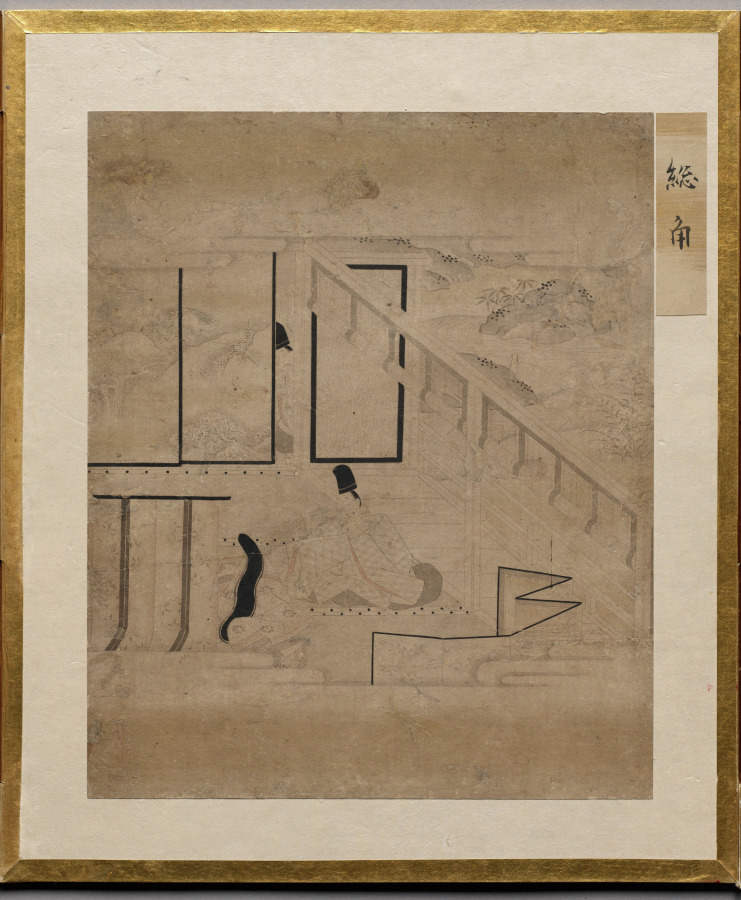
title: Trefoil Knots from Album of Illustrations for the Tale of Genji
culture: Japan, Edo period (1615–1868)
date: 1600s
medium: painting in an accordion-style album; ink, light color, and gold on paper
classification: Bound Volume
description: This album contains illustrations for the classic literary work the Tale of Genji, authored in the 1000s by Murasaki Shikibu, an aristocrat of the Heian period (794–1185) court. The scenes are painted in the “white drawing” (hakubyō) mode, in which a fine ink line is used to depict figures and spaces with great subtlety, punctuated only occasionally by traces of red pigment for a character’s lips, a detail of a garment, or a decorative element. These two scenes illustrate episodes from the chapters “Thin Veil of Cloud” (Usugumo) and “Barrier Gate” (Sekiya).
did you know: The illustrations are identified by chapter title in cartouches to the upper right of the paintings.